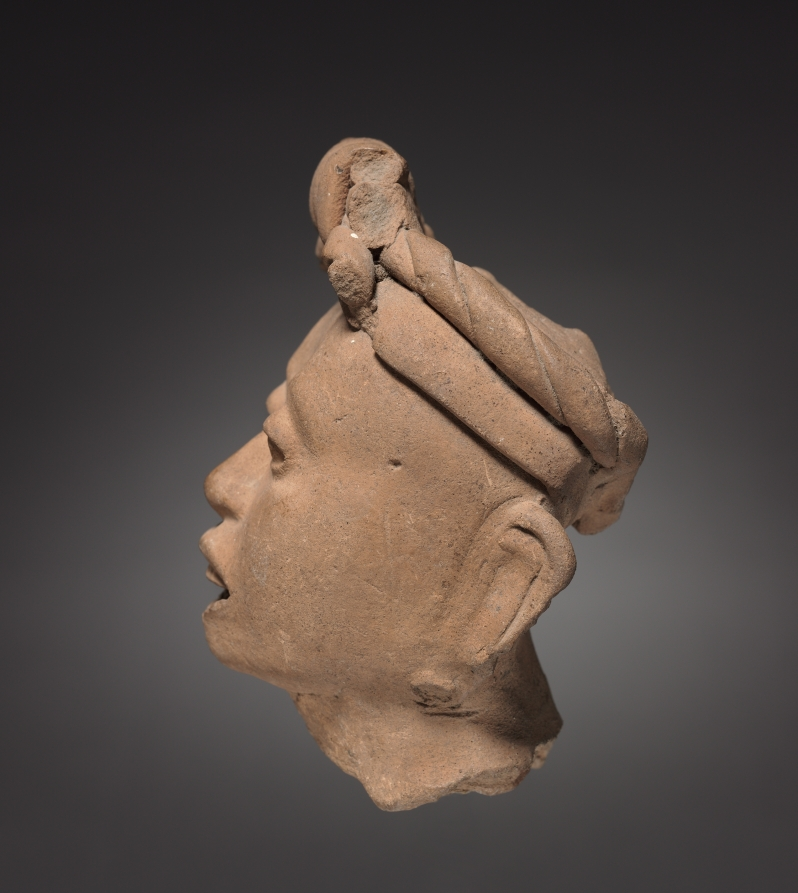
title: Head Fragment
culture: Mexico, Veracruz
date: 900–1200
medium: molded and modeled pottery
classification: Sculpture